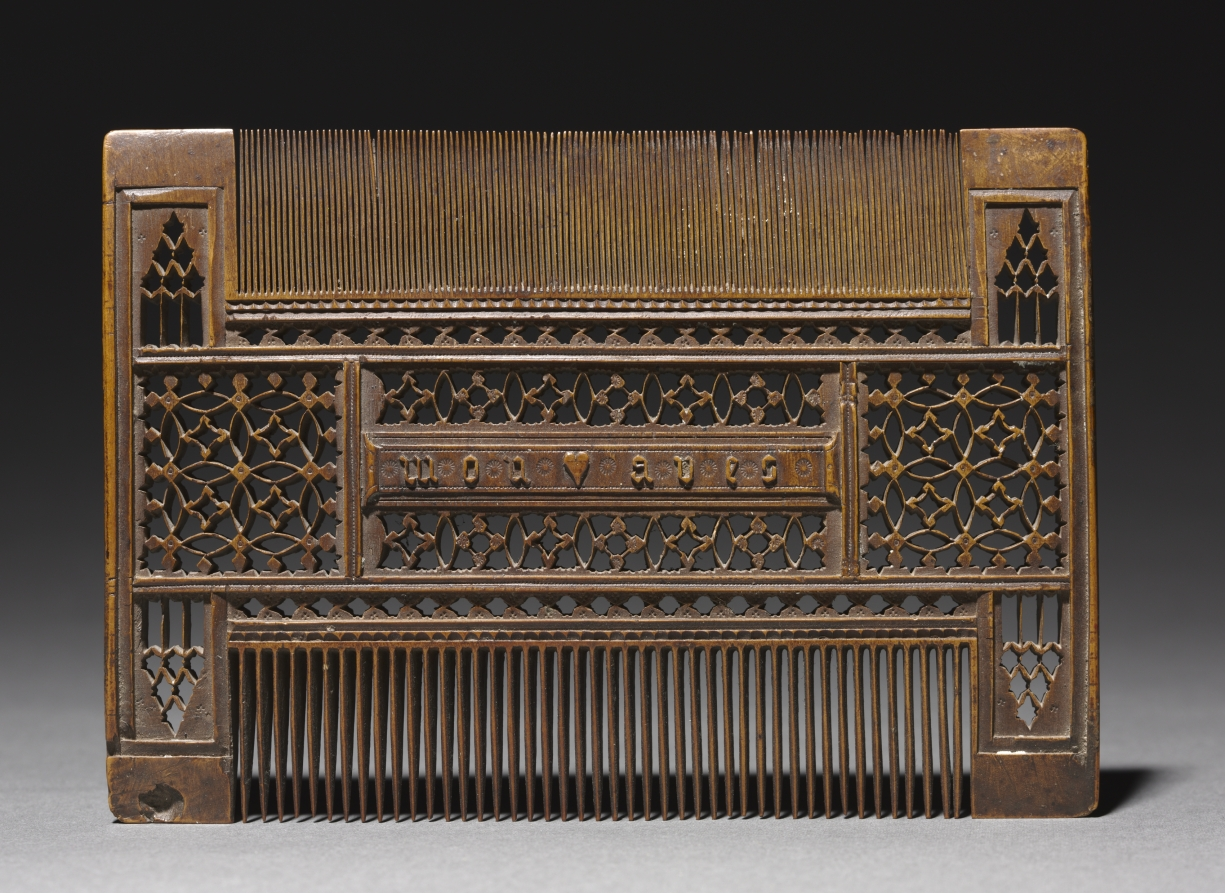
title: Comb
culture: France, Gothic period, 15th century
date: 1400s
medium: boxwood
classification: Jewelry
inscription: mon ♥️ aves pour bien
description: This luxury object is masterfully fashioned from a single piece of wood. The openwork carving is intended to resemble Gothic windows. The inscription reads, "mon ♥️ aves" on one side and "pour bien" on the other, translated to "you have my heart in your possession."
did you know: Boxwood is a light-colored wood which is very hard, close-grained, and fine-textured, allowing the carver to do very fine delicate work.